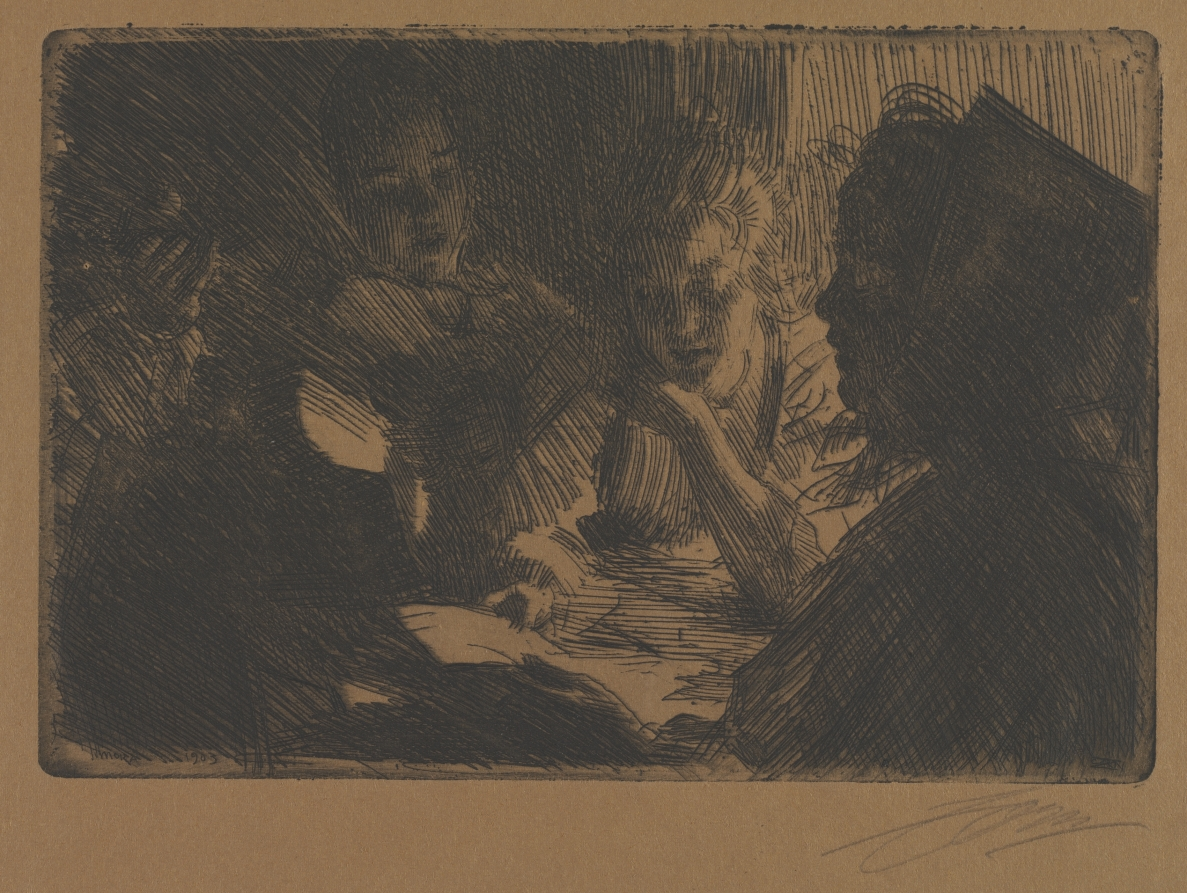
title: The New Ballad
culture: Sweden, late 19th-early 20th Century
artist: Anders Zorn (Swedish, 1860–1920)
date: 1903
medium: etching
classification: Print